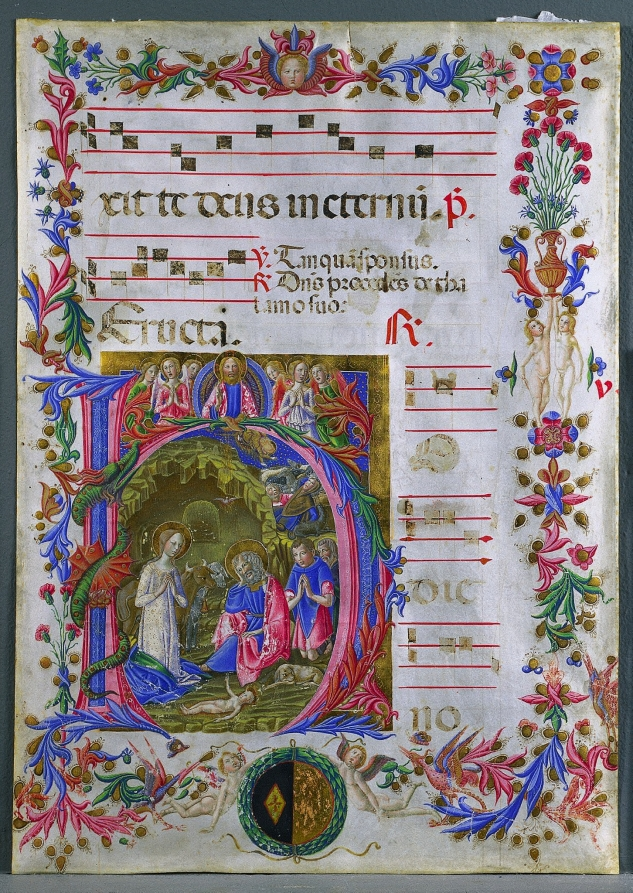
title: Single Leaf from an Antiphonary: Initial H[odie nobis] with The Nativity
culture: Italy, Siena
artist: Benvenuto di Giovanni (Italian, 1436–1509/17)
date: 1471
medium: ink, tempera, and gold on parchment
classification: Manuscript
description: This initial h introduces the first matins response for Christmas Day: Hodie nobis celorum rex (“On this day the King of Heaven”). Illustrating this artist’s love of fantastic detail, an entwined dragon climbs the ascender of the h. Christ’s nativity is within the letter, complete with adoring shepherds. Above is the figure of Christ blessing, surrounded by singing angels intended to suggest the heavenly realm. Benvenuto is first recorded in 1453, when he is known to have been working on the frescoes in the Siena Baptistery. This leaf comes from a set of choir books commissioned for Siena’s Hospital of Santa Maria della Scala by Niccolò Ricoveri, the hospital’s rector, as indicated by the coat of arms at the bottom of the leaf.